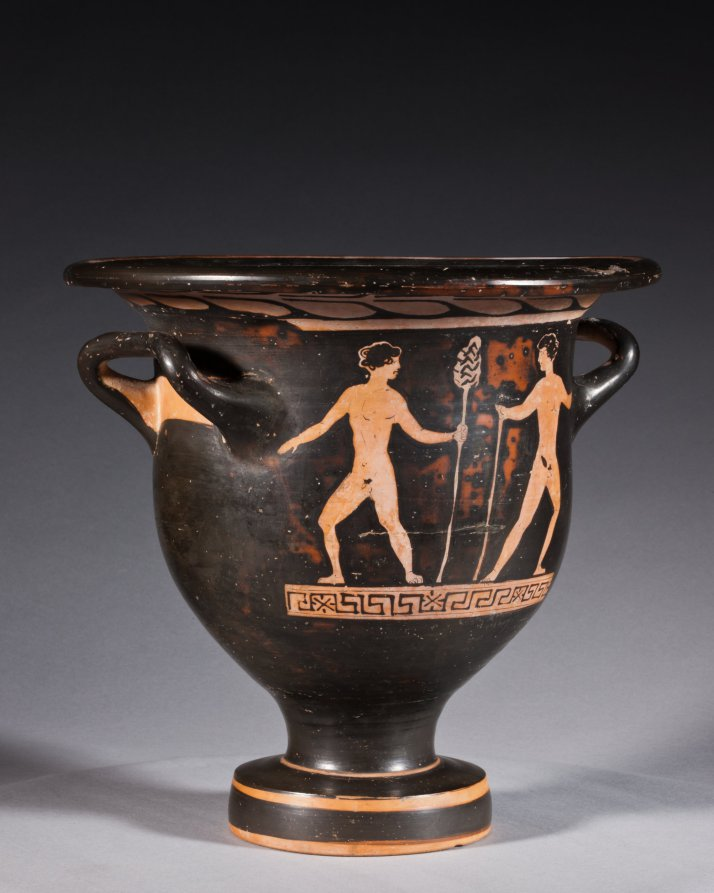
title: Red-Figure Bell Krater (Mixing Vessel): Aphrodite and Eros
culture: South Italian, Apulian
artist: attributed to Graz Painter (South Italian, Apulian, active c. 380–360 BCE)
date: c. 370–360 BCE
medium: ceramic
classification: Ceramic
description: This small mixing vessel shows a finely dressed woman seated on a chest and holding up a mirror to admire herself. Before her stands Eros, the winged god of love, holding a ribbon or sash. Behind the woman stands a pillar with the inscription ΑΦΡΟΔΙΤΗ, or APHRODITE, the goddess of love. Such labels are rare on vases, and scholars debate whether this names the woman shown as Aphrodite herself, with her son Eros, or a bride envisioning herself as Aphrodite, just before her wedding.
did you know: The dancing nude youths on the reverse are unusual; typically they would be standing and draped.